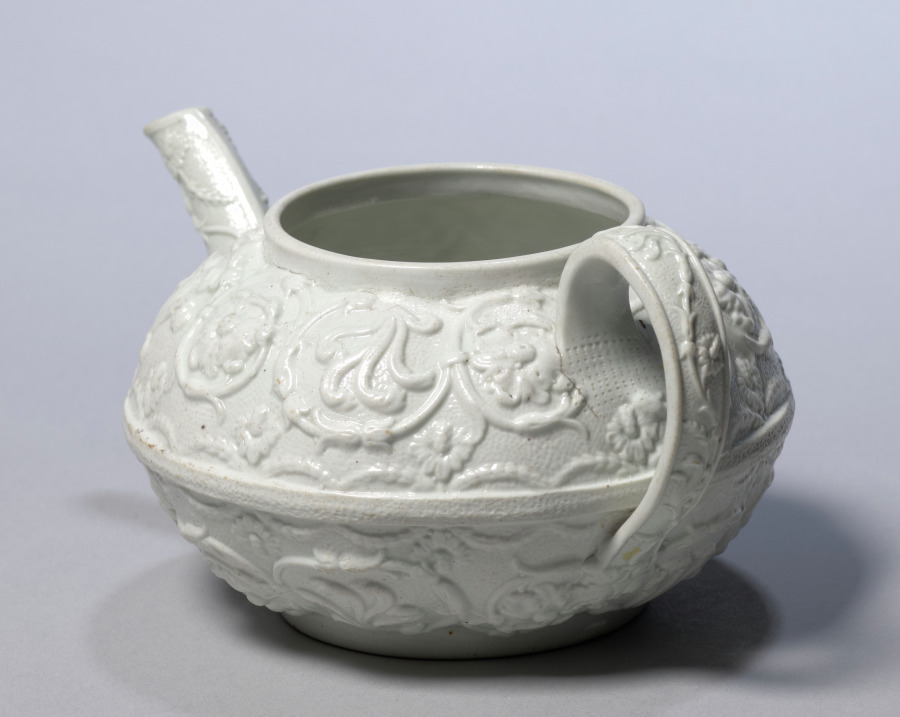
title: Teapot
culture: England, Staffordshire, 19th century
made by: Wedgwood Factory (British)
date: c. 1830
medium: stoneware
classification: Ceramic